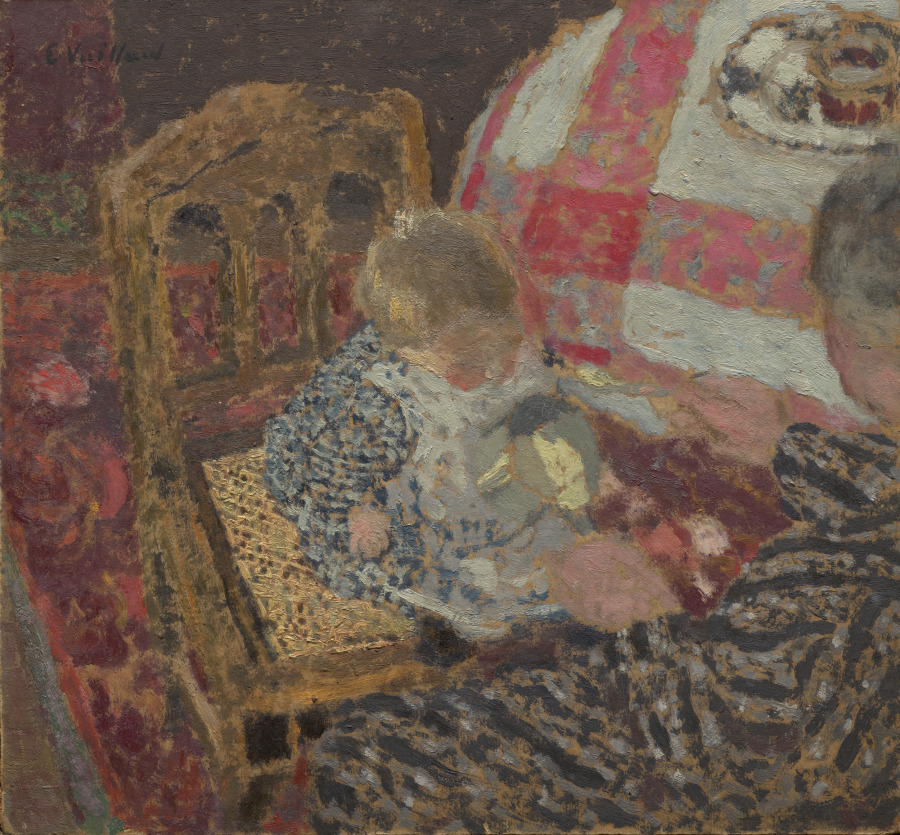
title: Luncheon (Annette and Her Grandmother)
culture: France, 19th century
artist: Édouard Vuillard (French, 1868–1940)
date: 1899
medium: oil on board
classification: Painting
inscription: Artist's signature: upper left: E Vuillard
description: Vuillard depicted close family members in this intimate domestic scene. The woman at the lower right corner of the composition is his mother, Marie Vuillard. She is tending to a her grandchild, Annette Roussel, the daughter of Vuillard’s sister and her husband, Ker-Xavier Roussel, who was also an artist. The two figures are in the apartment that Vuillard shared with his mother in Paris. Vuillard adopted a particularly steep angle of view in this painting, looking down upon the interaction of the figures. The viewer assumes the position of the artist himself, looking over his mother’s shoulder as she lovingly feeds the baby.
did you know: Vuillard began visiting his sister's home in the country more frequently and for extended periods of time after the birth of Annette, who was one year old at the time of this painting.